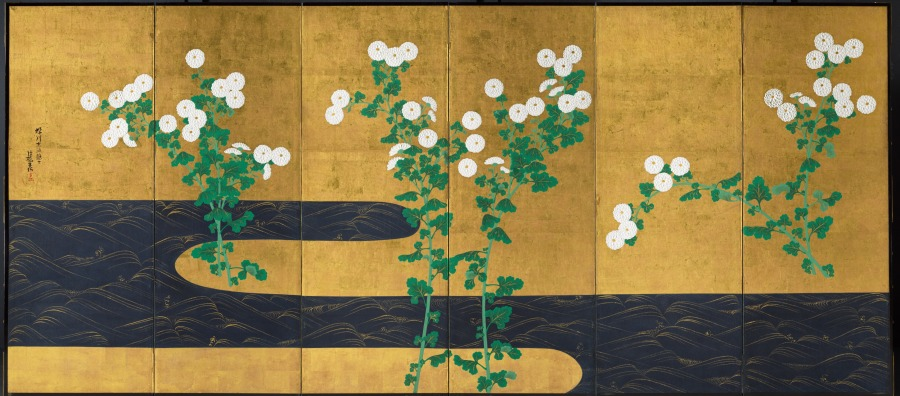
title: Chrysanthemums by a Stream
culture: Japan, Edo period (1615–1868)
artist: possibly by Ogata Kōrin (Japanese, 1658–1716)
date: c. 1715–30 or after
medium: One of a pair of six-panel folding screens; ink and color on gilded paper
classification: Painting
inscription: the signature and seal of Korin, "sensen mappa (makko) inshi hokyo Korin" (late generation hermit of the Kamo stream tradition) is written in two lines. A circular seal which reads "Hoshuku" is at the end of the second line on the edge of the first panel from the right.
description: These screens recall a painting style so closely identified with Ogata Kōrin (1658–1716) that it is called Rinpa, or “Rin School,” after the ideograph “rin” in his name. The highly stylized background accentuates floral groupings that have been groomed so as to appear utterly artificial, like the synthetic arrangements available today. Kōrin's genius derived in large measure from natural phenomena painstakingly observed and then manipulated to create compositions of startling refinement and sparkling isolation. This process may have grown out of Kōrin's early immersion in the family textile business, a medium that encourages such dramatic distillations of form: the stream's gold-crested waves bring to mind traditional kimono robe designs of Kōrin's era. Works with the signature seen on this painting, including a style name, or persona suggested to Kōrin by his brother Kenzan (1663–1743), are sometimes considered to have been produced either in the last year of his life, when he was very ill, or after his death. In both scenarios, the lion’s share of the work would have been done by studio assistants, but little is truly known of his studio practice. Given the regularity of the gold waves on the stream, and the tension in the arrangement of the chrysanthemums, it is also possible that the screens were made in emulation of Kōrin's designs by a later artist.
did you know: The signature used on these screens may indicate paintings made in the last year of the artist's life, or works completed by his studio after his death.